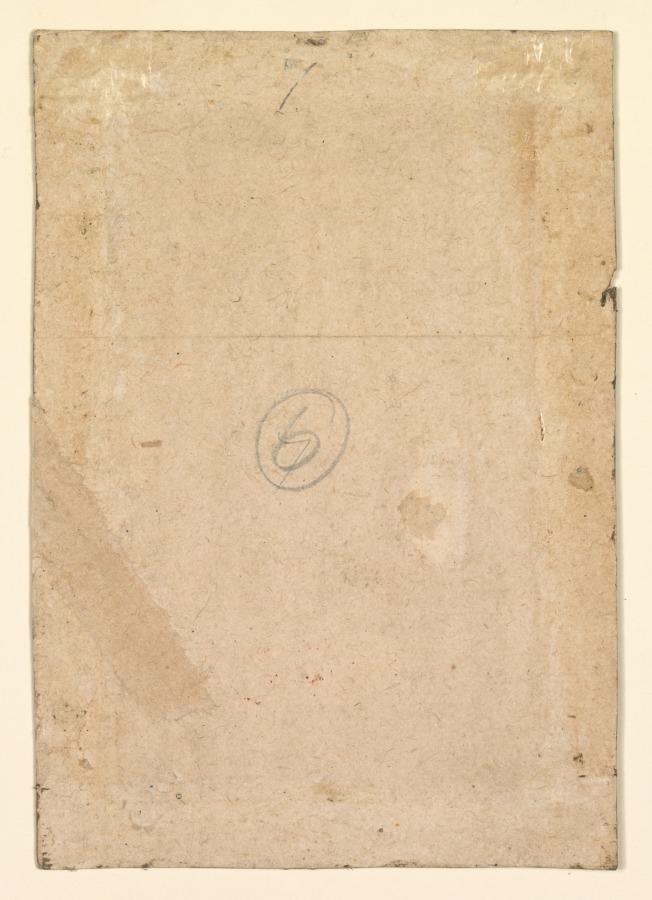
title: A European Couple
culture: India, Bijapur, Deccan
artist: attributed to Ali Riza, the "Bodleian Painter" (Indian)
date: c. 1610–27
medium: Gum tempera and gold on paper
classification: Painting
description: This painting of a European couple seems to be based on close observation and a desire to record the appearance of foreigners. The artist has accurately depicted the 17th-century European clothing in great detail, particularly in the collar ruffs, linen cuffs, and ornate jewelry worn by both figures.